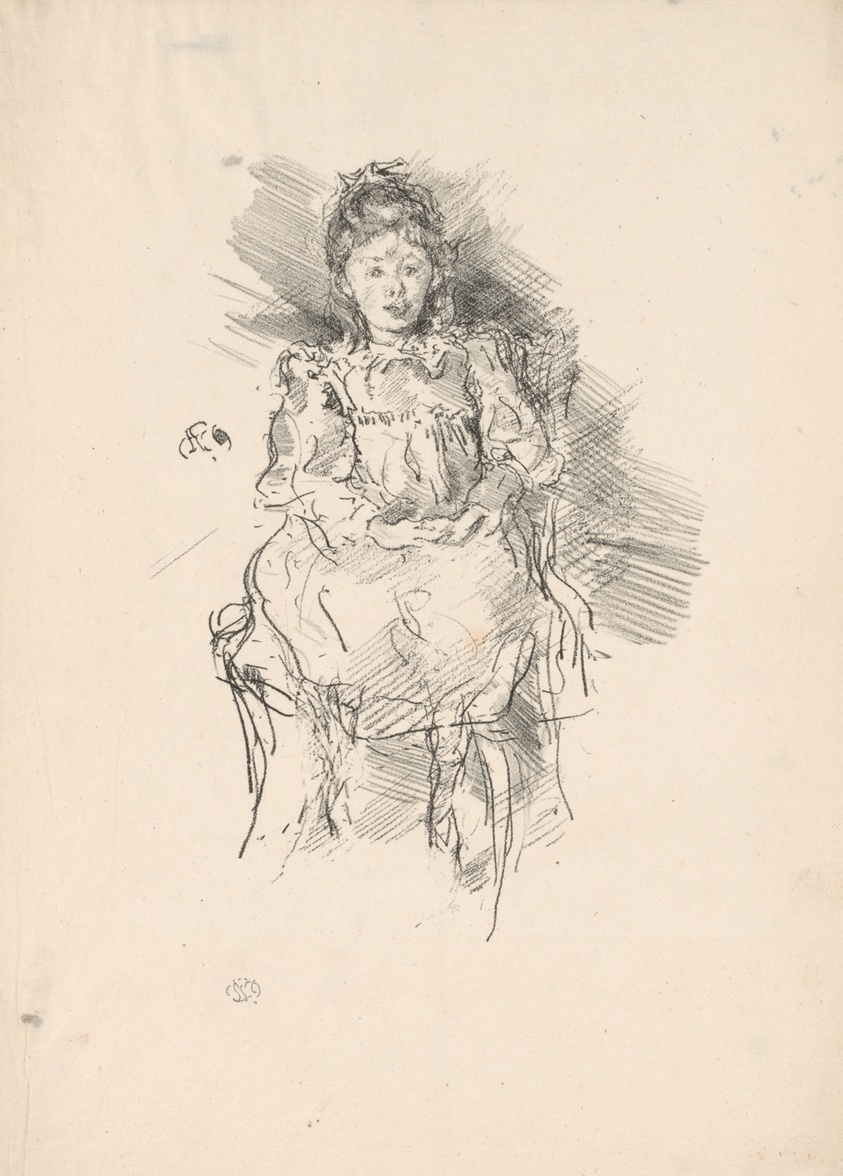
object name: Print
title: Little Dorothy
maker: James McNeill Whistler (American, 1834-1903)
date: 1896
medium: Transfer lithograph in black on ivory wove paper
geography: United States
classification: transfer lithograph; lithograph; print; prints and drawing; paper